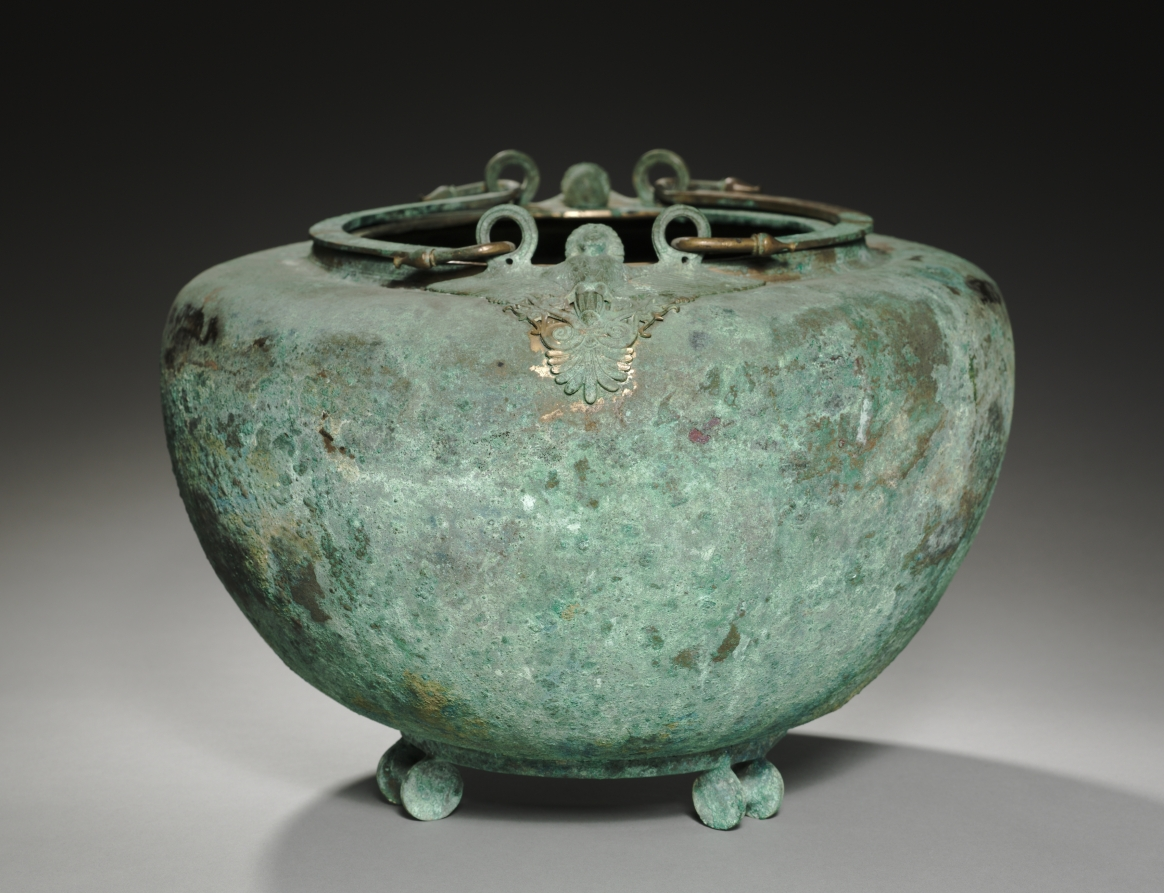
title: Lebes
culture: Greece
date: c. 480–460 BCE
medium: bronze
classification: Metalwork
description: This bronze cauldron has a ring base with three spool feet. Appliqués shaped like birds with the heads of women decorate the shoulder on either side of the vessel. Two handles are fastened to loops on the top of each creature’s wings. The bird-women may represent sirens, mythical creatures that lured sailors with their singing, or harpies, wind spirits that stole food from the starving.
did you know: The green surface found on old bronze is a corrosion product formed when copper in the metal reacts to carbon dioxide and water.